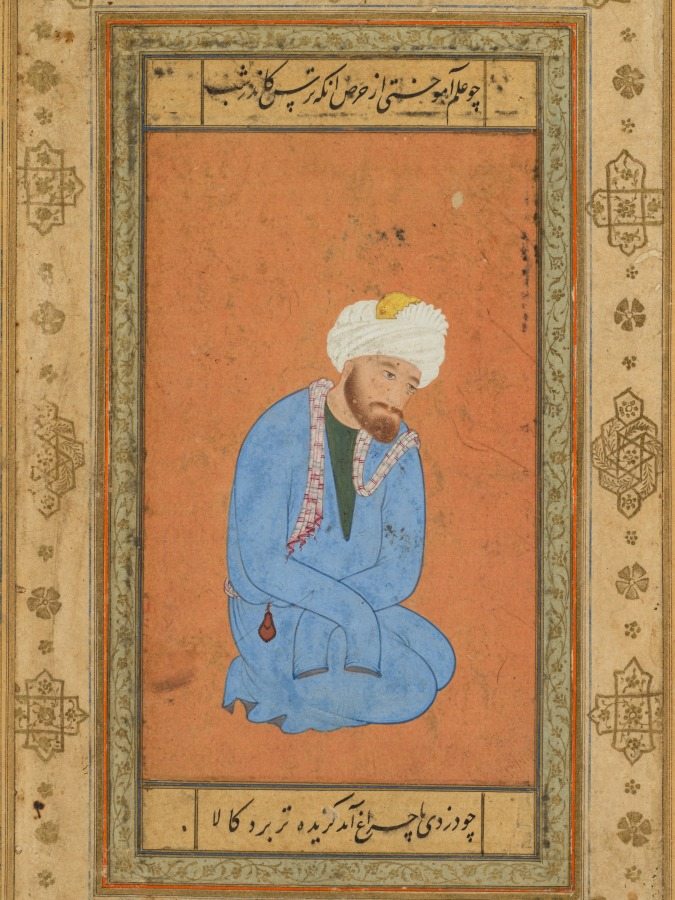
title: Portrait of a kneeling holy man, from the Prince Salim Album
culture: Mughal India, court of Akbar (reigned 1556–1605)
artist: attributed to Mir Sayyid Ali (Persian, active in Iran 1540s–50, active in India 1555–1580)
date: c. 1556–60; border c. 1602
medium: Gum tempera, ink, and gold on paper, laid down on an album page with cream borders decorated with gold flowers and geometric motifs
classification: Painting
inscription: [[verso, upper left corner]] 6212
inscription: [[verso, upper left corner]] 20.865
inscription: [[verso, upper center, below crossed out words and circled]] red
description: The kneeling figure is a charlatan holy man who wears the blue robe of a Sufi mystic. According to the inscriptions above and below the painting, he acts humble and pious for monetary gain rather than sincerity of devotion. Images of charlatan holy men recur in Mughal painting, including in the Cleveland Tuti-Nama. Mir Sayyid Ali was the first head of the Mughal workshop under Akbar. He was responsible for training Indian artists to adopt Persian sensibilities, admired by elites of the Islamic world during the 1400s to at least the 1700s.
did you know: In this sensitive portrayal of a charlatan holy man, the eyes are pale and empty.